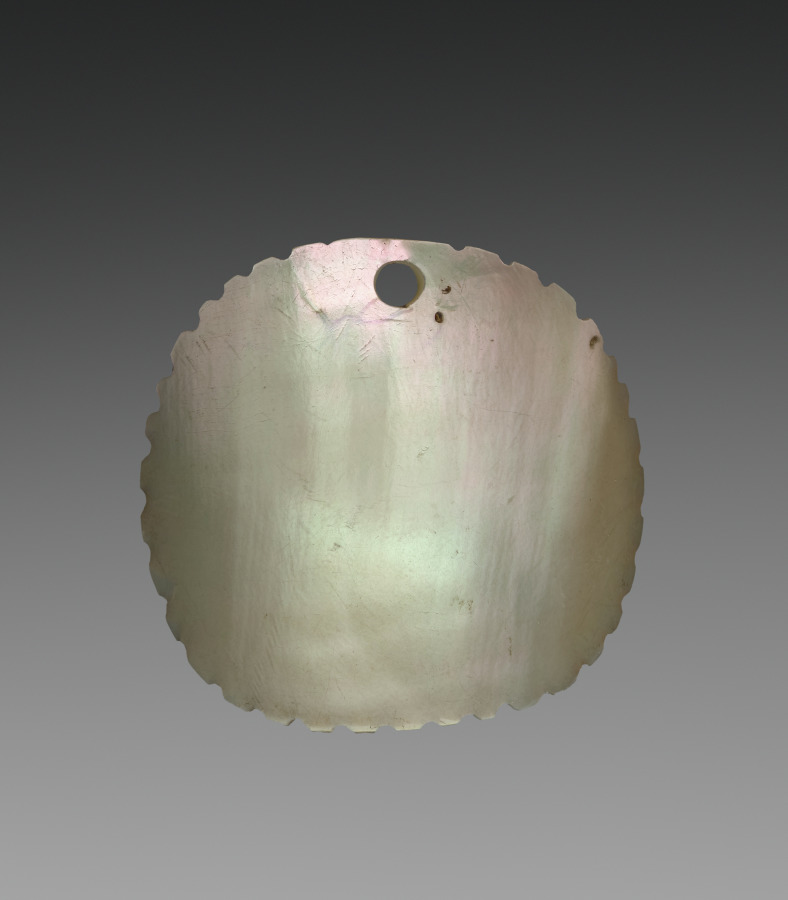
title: Earring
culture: probably Malacian or South Sea Islands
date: before 1916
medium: mother-of-pearl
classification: Jewelry